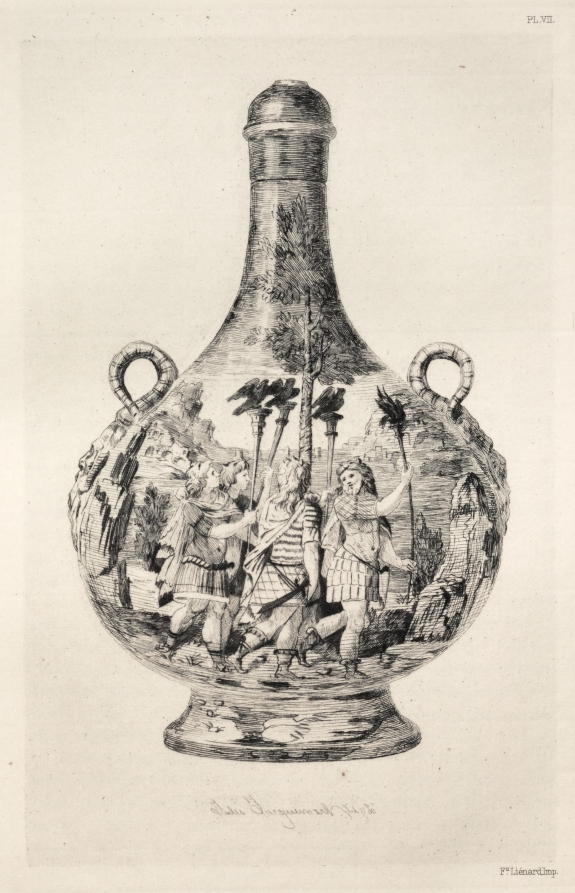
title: History of the Ceramic Art: A Descriptive and Philosophical Study of the Pottery of All Ages and All Nations: Italy: Renaissance- Majolica of Urbino- Ewer (Plate VIII)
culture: France, 19th century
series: Book by Albert Jacquemart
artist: Jules Jacquemart (French, 1837–1880)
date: 1877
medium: etching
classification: Bound Volume